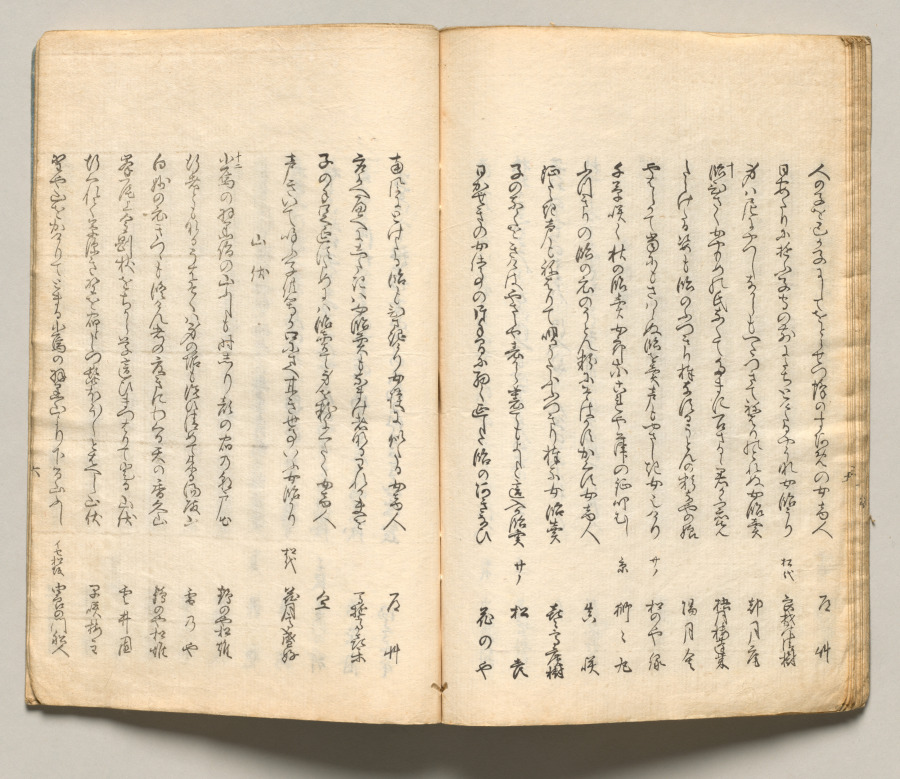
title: Spread Fourteen from Volume Seven of People of Japan in Light Verse (Kyōka)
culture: Japan, Edo period (1615–1868)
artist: Utagawa Hiroshige (Japanese, 1797–1858)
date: 1857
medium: Woodblock-printed book; ink and color on paper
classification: Bound Volume